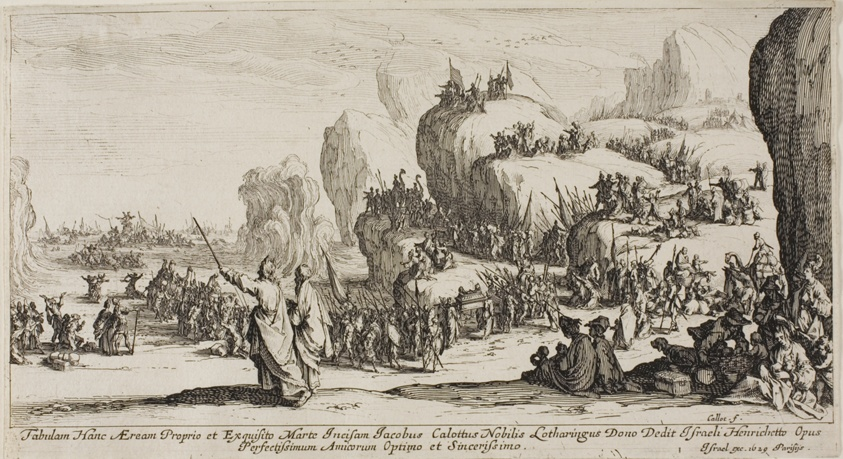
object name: Print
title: The Passage of the Red Sea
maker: Jacques Callot (French, 1592-1635)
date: 1628–30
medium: Etching on paper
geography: France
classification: etching; print; prints and drawing